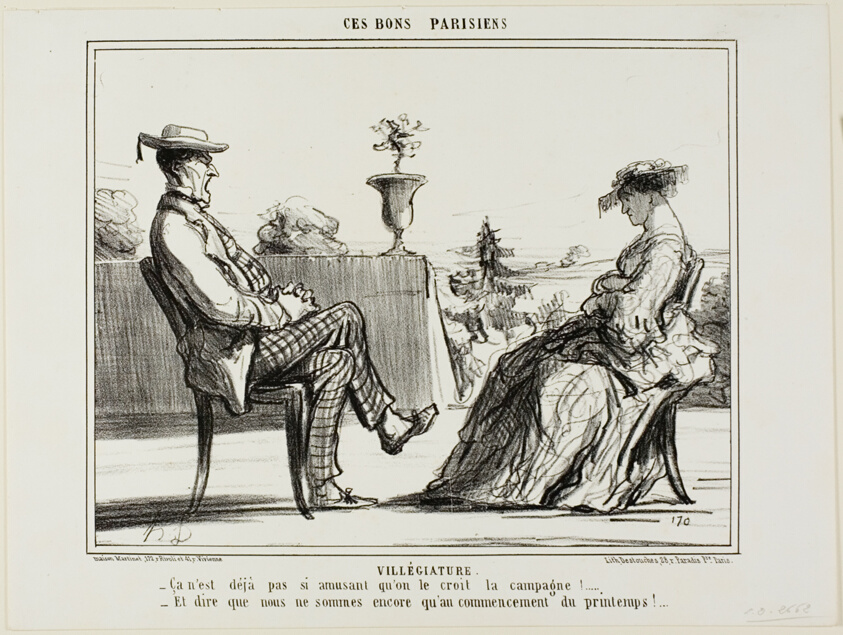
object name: Print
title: Holiday in the Country. “- Life in the country really isn't all that entertaining, as they all say. - And to think that spring has only just begun,” plate 14 from Ces Bons Parisiens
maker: Honoré Victorin Daumier; French, 1808-1879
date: 1858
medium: Lithograph in black on white wove paper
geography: France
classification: lithograph; print; prints and drawing